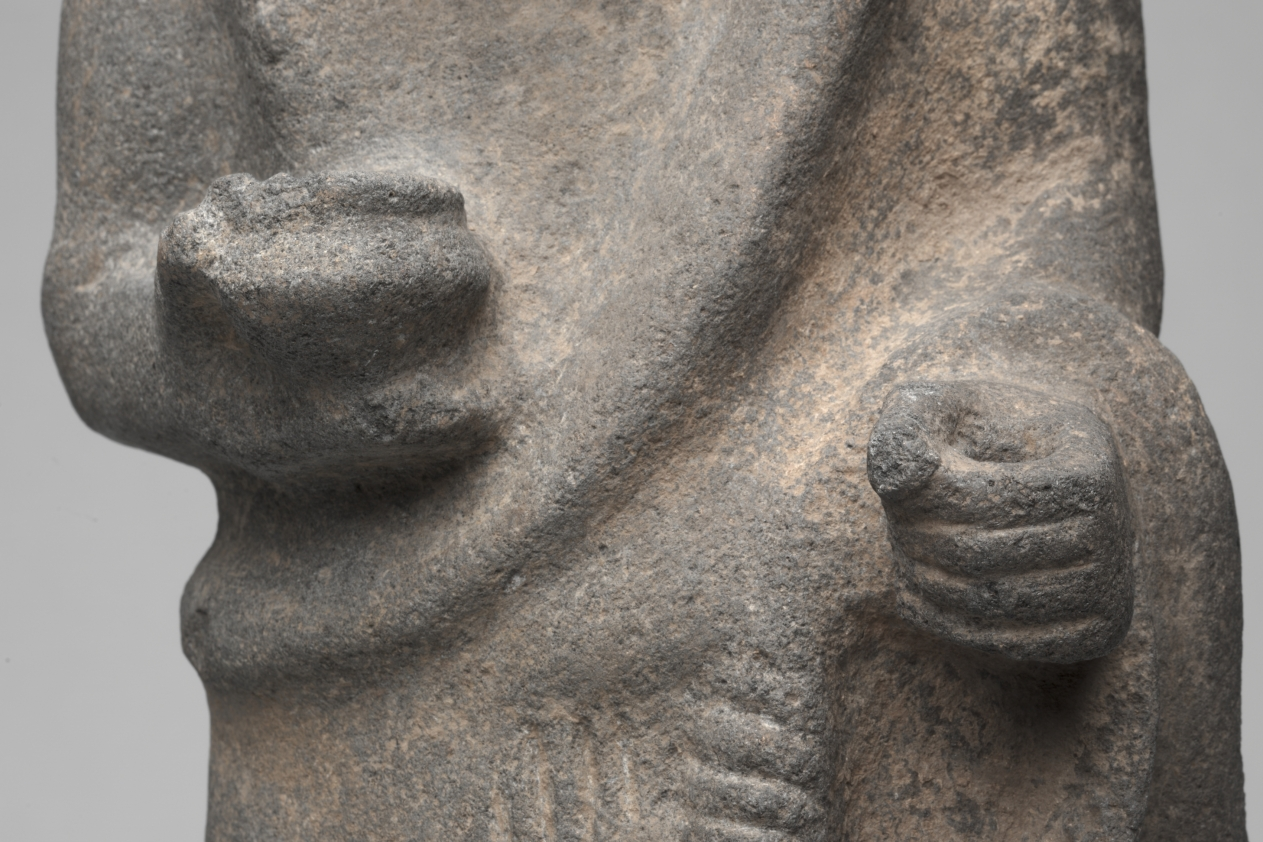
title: Priest-King or Deity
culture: Hittite, North Syria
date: c. 1600 BCE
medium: basalt with bone eyes (left, ancient; right, restored)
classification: Sculpture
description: The Hittites migrated into Anatolia in the 3rd millennium BCE and spoke an Indo-European language, a group that includes Greek, Latin, Persian, Sanskrit, English, and most modern European languages. They were the first ancient people to use iron for weapons. From about 1600–1200 BCE their empire was at its peak, extending from central Anatolia to Syria, and south along the eastern Mediterranean. Their vast empire and interest in commerce enabled the Hittites to spread Mesopotamian ideas and culture throughout the ancient Mediterranean world. This large basalt sculpture is exceptionally rare in depicting a Hittite god or priest-king wearing a horned conical crown, false beard, and long robe. He holds a bowl in his right hand and once held something in his left, perhaps a staff or sword.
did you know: The left eye of the sculpture is the original bone inlay while the right eye is a modern restoration done after the piece was damaged.